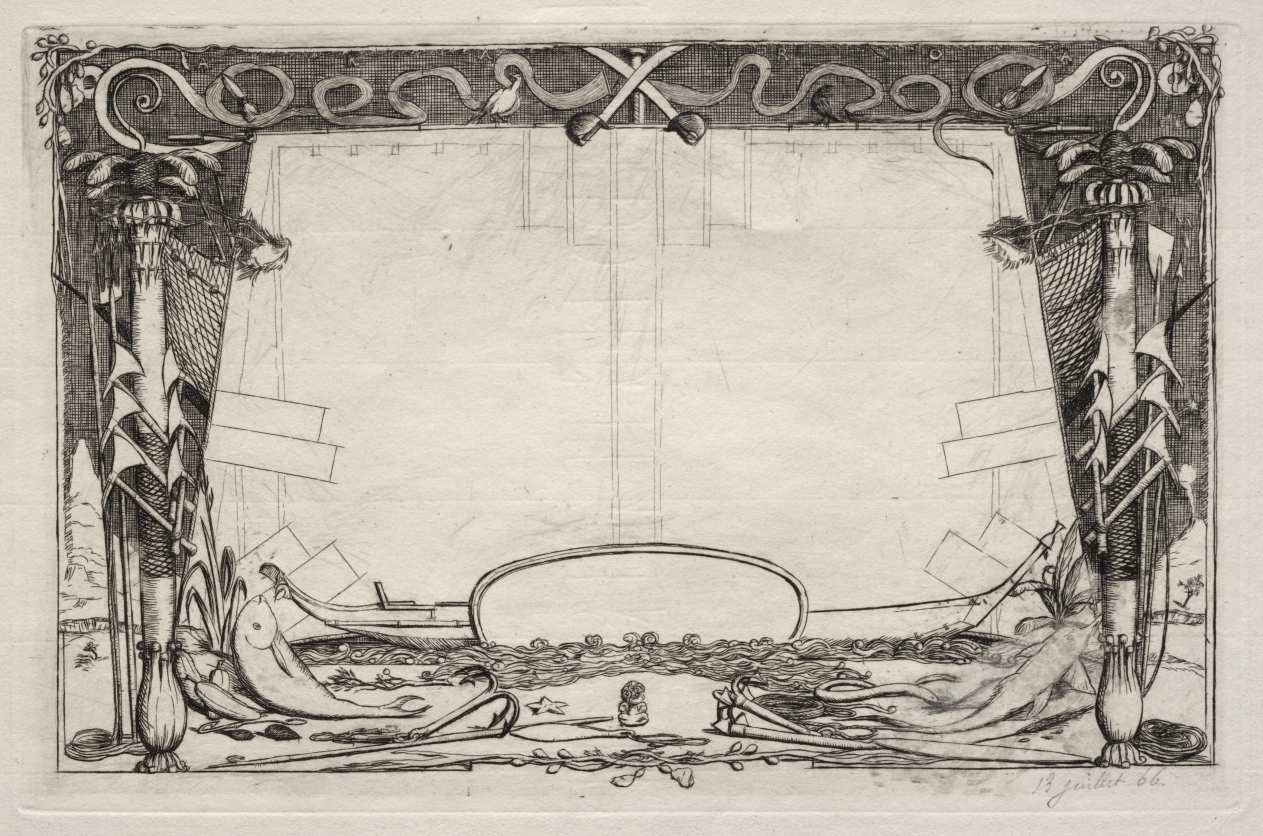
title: A Voyage to New Zealand (1842-1846): Cover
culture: France, 19th century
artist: Charles Meryon (French, 1821–1868)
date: 1866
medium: etching retouched in pencil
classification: Print